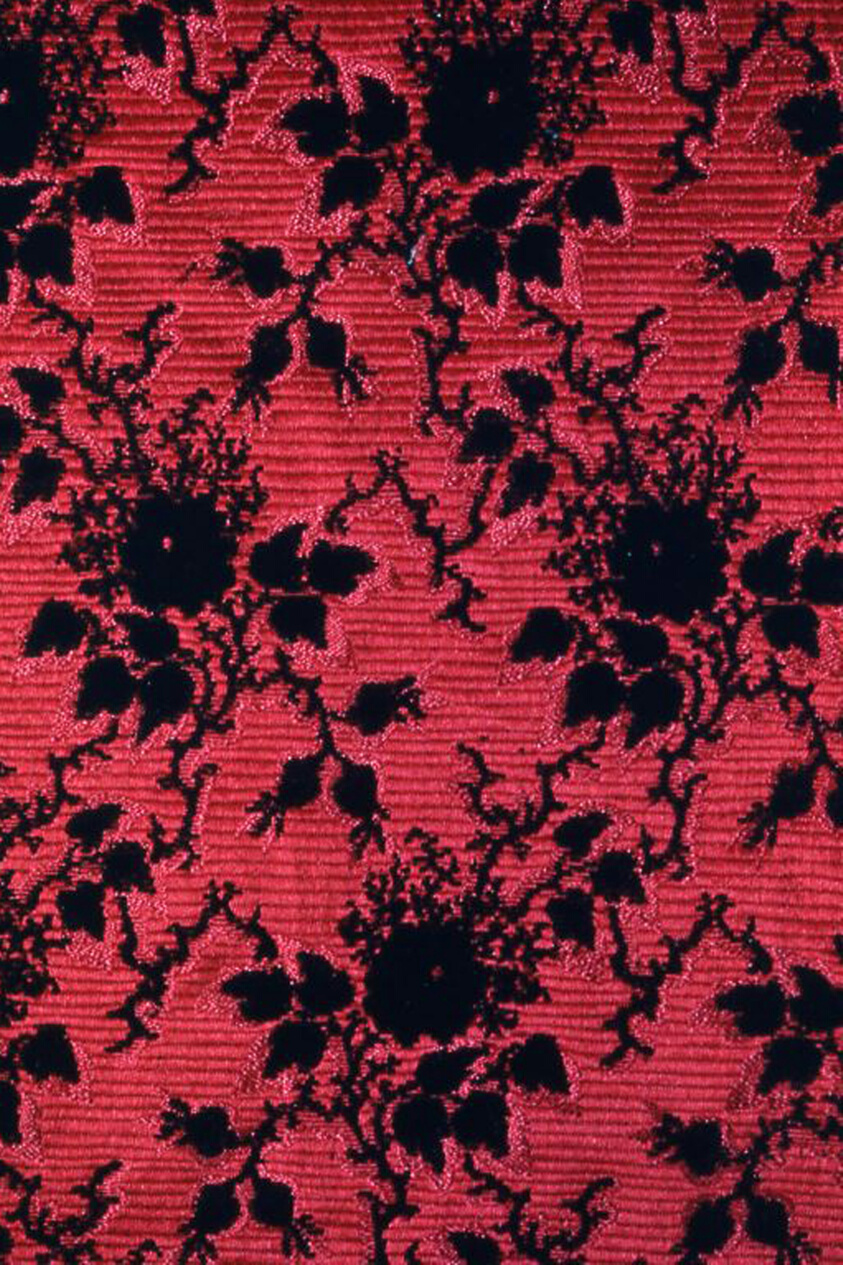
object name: Textile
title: Fragment (From a Vest)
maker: France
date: c. 1820/40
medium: Silk; velevt: cut, uncut, voided; against compound weave foundation.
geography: France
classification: textile; weaving - velvet; weaving